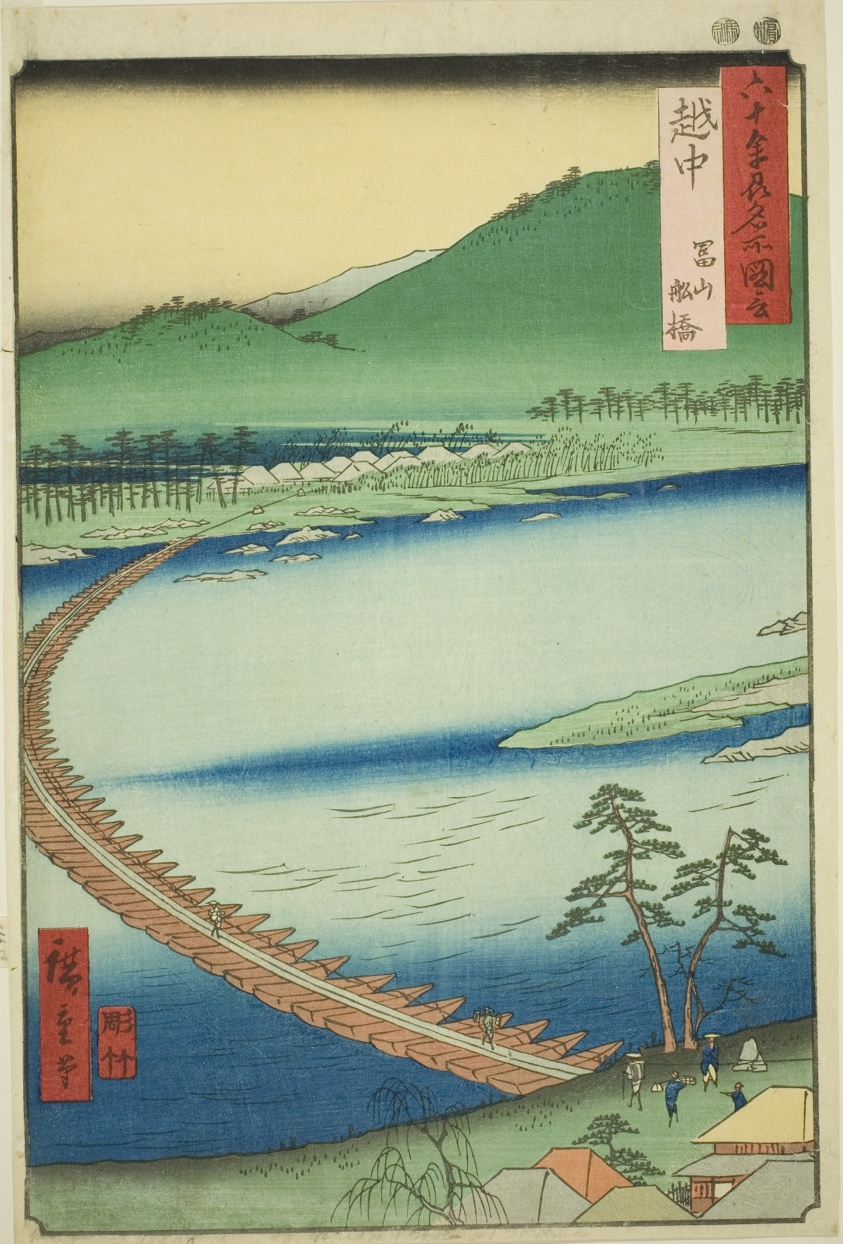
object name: Print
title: Etchu Province: Pontoon Bridge at Toyama (Etchu, Toyama funabashi), from the series "Famous Places in the Sixty-odd Provinces (Rokujuyoshu meisho zue)"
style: Japanese (culture or style)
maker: Utagawa Hiroshige 歌川 広重; Japanese, 1797-1858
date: 1853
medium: Color woodblock print; oban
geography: Japan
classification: woodblock print; print; asian art